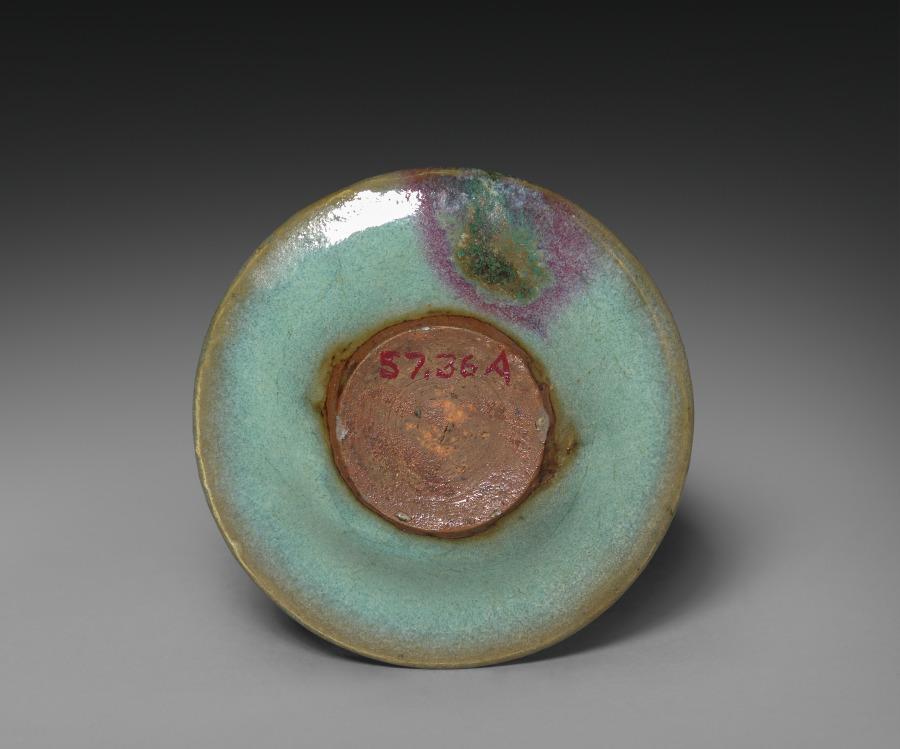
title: Jar with Cover (cover)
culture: China, Henan province, Yuxian, Northern Song dynasty (960-1127) or Jin dynasty (1115-1234)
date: 1100s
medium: porcelaneous stoneware with blue glaze and splashes of purple, Jun ware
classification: Ceramic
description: The beauty of Jun ware lies in its spectacular glaze effects, which provide immediate visual appeal. The glaze that is thickly applied onto the heavily potted body also lends the vessel a sense of volume. As shown here, its glaze colors range from soft milky-blue to rose-purple. The purple suffusions are created by splashing or brushing copper-rich pigments onto the glaze before firing. The merging of purple splashes with opalescent blue glaze displays rich tonal variations, resembling purplish glows at sunset.